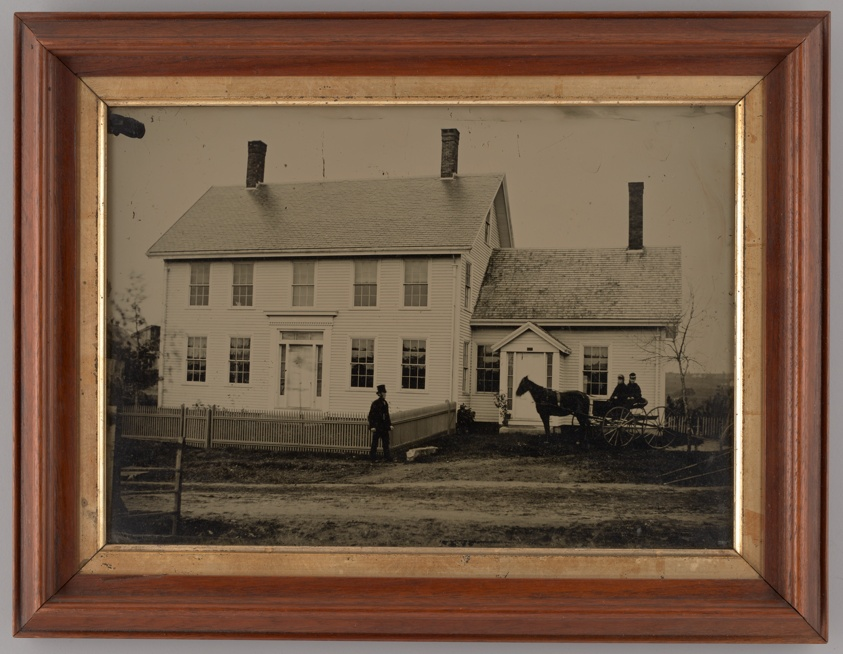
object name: Photograph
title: Untitled (House with Horse-Drawn Carriage and Three People)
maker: Unknown maker; American, 19th century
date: 1865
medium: Ambrotype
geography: United States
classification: portrait; ambrotype; portrait; photograph; photographic process; photography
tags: lundberg collection, houses, people